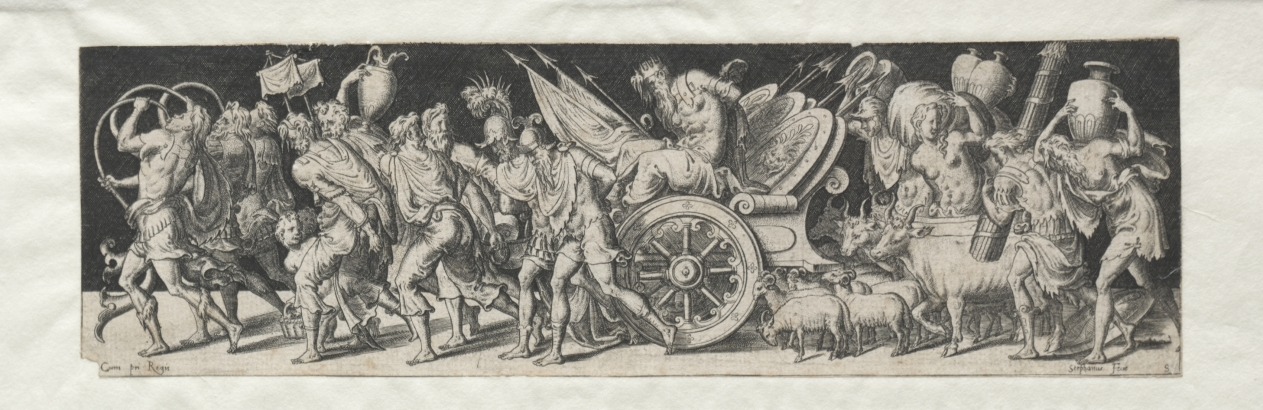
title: Combats and Triumphs No. 2: Triumphant March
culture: France, 16th century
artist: Etienne Delaune (French, 1518/19-c. 1583)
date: c. 1550–72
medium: engraving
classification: Print